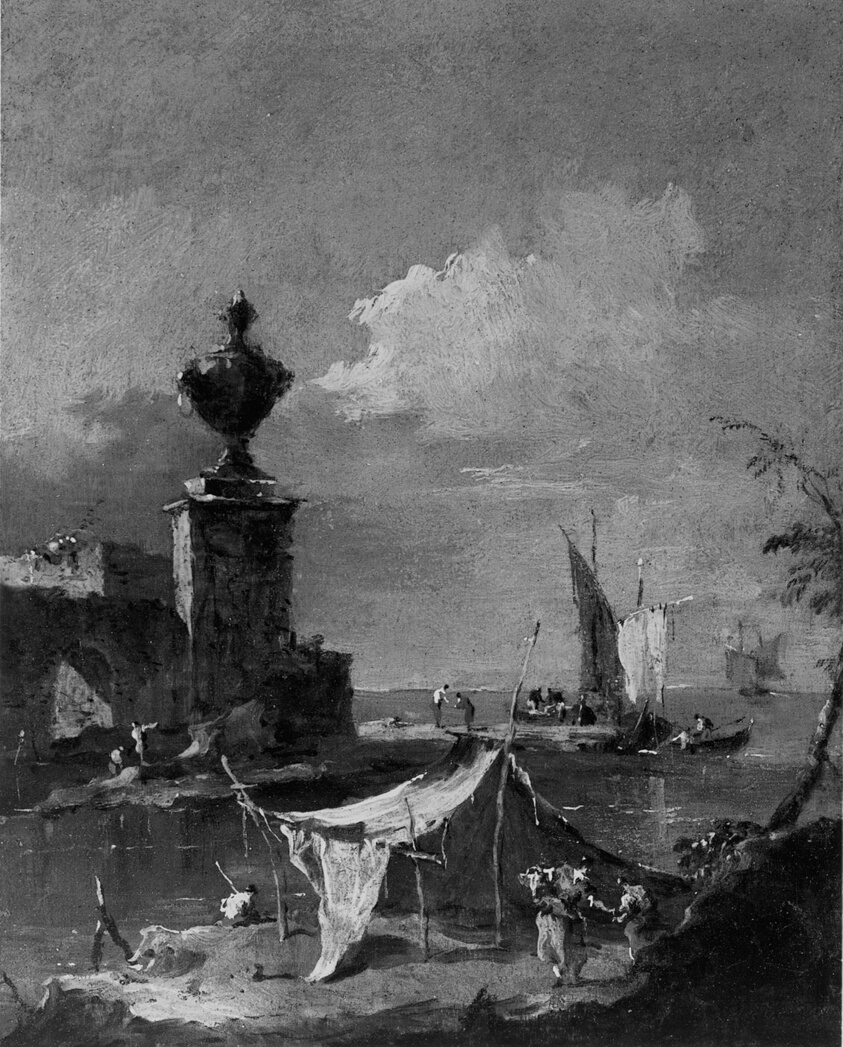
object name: Painting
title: Capriccio: The Lagoon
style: 18th Century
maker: Francesco Guardi (Italian, 1712–1793)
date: After 1770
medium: Oil on canvas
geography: Italy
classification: oil on canvas; Italian; oil paintings (visual works); paint; painting; european painting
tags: lagoons, tents, boatman, boats, trees, ruins, men, figures, poverty, water